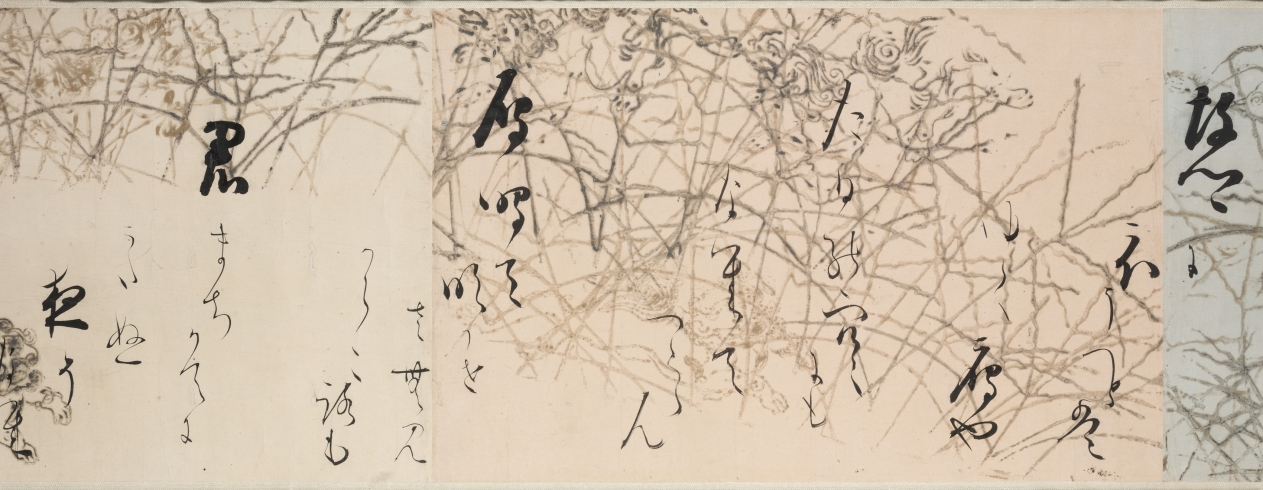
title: Selections from the New Collection of Japanese Poems from Ancient and Modern Times (Shinkokin wakashū) with Printed Designs of Chinese Lions and Crab Finger Grass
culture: Japan, Edo period (1615–1868)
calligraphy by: Hon'ami Kōetsu (Japanese, 1558–1637)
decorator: Tawaraya Sōtatsu (Japanese, c. 1570–c. 1640)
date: early 1600s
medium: handscroll; ink, gold, and silver on paper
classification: Calligraphy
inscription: Seal: 光悦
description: Hon’ami Kōetsu was a calligrapher and craftsman who frequently collaborated with the painter Tawaraya Sōtatsu, considered the first master of the Rinpa school. Kōetsu brushed seven poems from the autumn section of a poetry anthology onto dyed paper with motifs designed and printed in gold and silver by Sōtatsu.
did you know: Before becoming a master painter of screens, Tawaraya Sōtatsu painted fans.